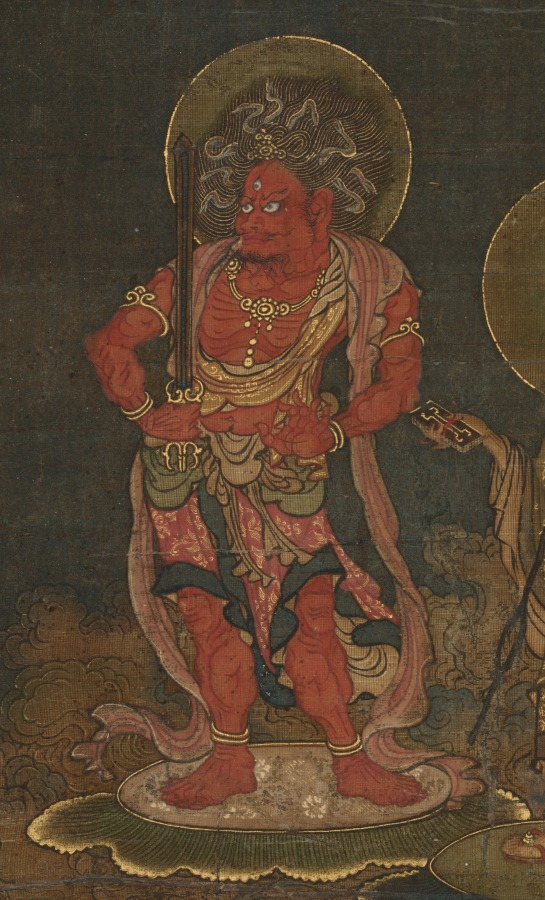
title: Descent of the Nine Luminaries and the Seven Stars at Kasuga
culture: Japan, Nanbokuchō period (1336–92)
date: mid- to late 1300s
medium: Hanging scroll; ink, color, gold and cut gold on silk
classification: Painting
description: This medieval religious painting shows celestial beings descending from the heavens into the Kasuga Shrine, a major religious site in Japan's ancient capital, Nara. The moon and the Kasuga mountain range appear in the uppermost portion of the painting, as does a red shrine entrance gate, or torii. In the upper part of the painting, figural representations of the stars in the constellation known as the Big Dipper in the West descend from right to left on cloud banks. In the lower part, the Nine Luminaries (Sanskrit: Navagraha) that emerged from the Vedic tradition—the sun and moon; the planets Jupiter, Mars, Saturn, Venus, and Mercury; and personifications of the fluctuating lunar nodes—descend in similar fashion. The painting uses the "deities in descent" scheme originating in China, as well as the original Buddhist form mandala (Japanese: honjibutsu mandarazu) format prevalent in medieval Japanese Shinto-Buddhist painting, to generate an image connected to the worship of celestial bodies in Esoteric Buddhism.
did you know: A 19th-century copy of this painting in ink and light color exists at the Kyoto City University of Arts.